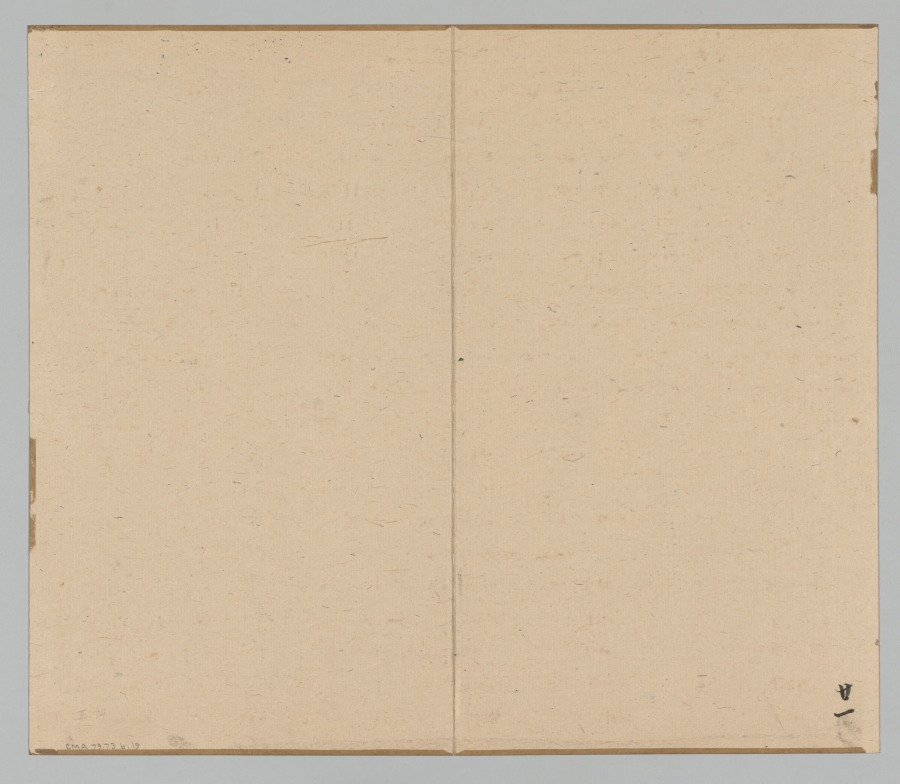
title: Reverberations of Taiga, Volume 2 (leaf 19)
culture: Japan, Edo period (1615–1868)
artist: Aoki Shukuya (Japanese, d. 1802)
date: mid- to late 1700s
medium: double-leaf from a pair of albums; ink and light color on paper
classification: Portfolio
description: Traditionally, young painters in Japan began their studies with an established master-painter. The master's compositions invariably became models that the apprentice copied to learn various ink and brush techniques. Shukuya was a pupil of the famous Kyoto artist Ikeno Taiga, whose style is reflected in these sketches of rocks, trees, and mountains.